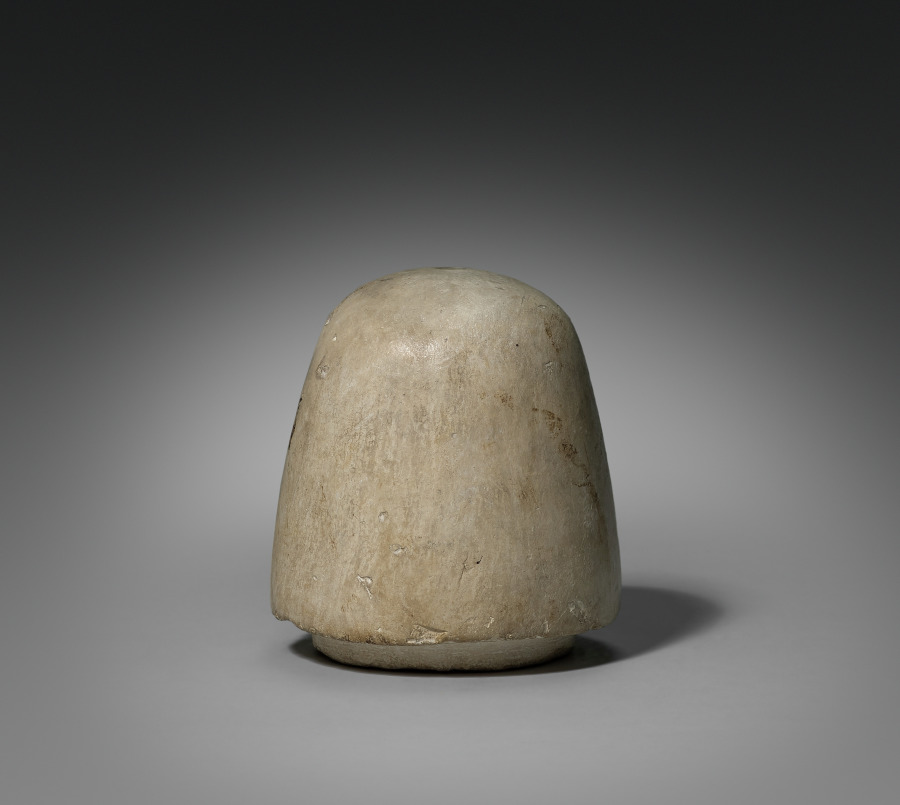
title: Canopic Jar with Lid (lid)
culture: Egypt, New Kingdom (1540–1069 BCE), Dynasty 18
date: 1540–1296 BCE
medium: limestone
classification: Funerary Equipment